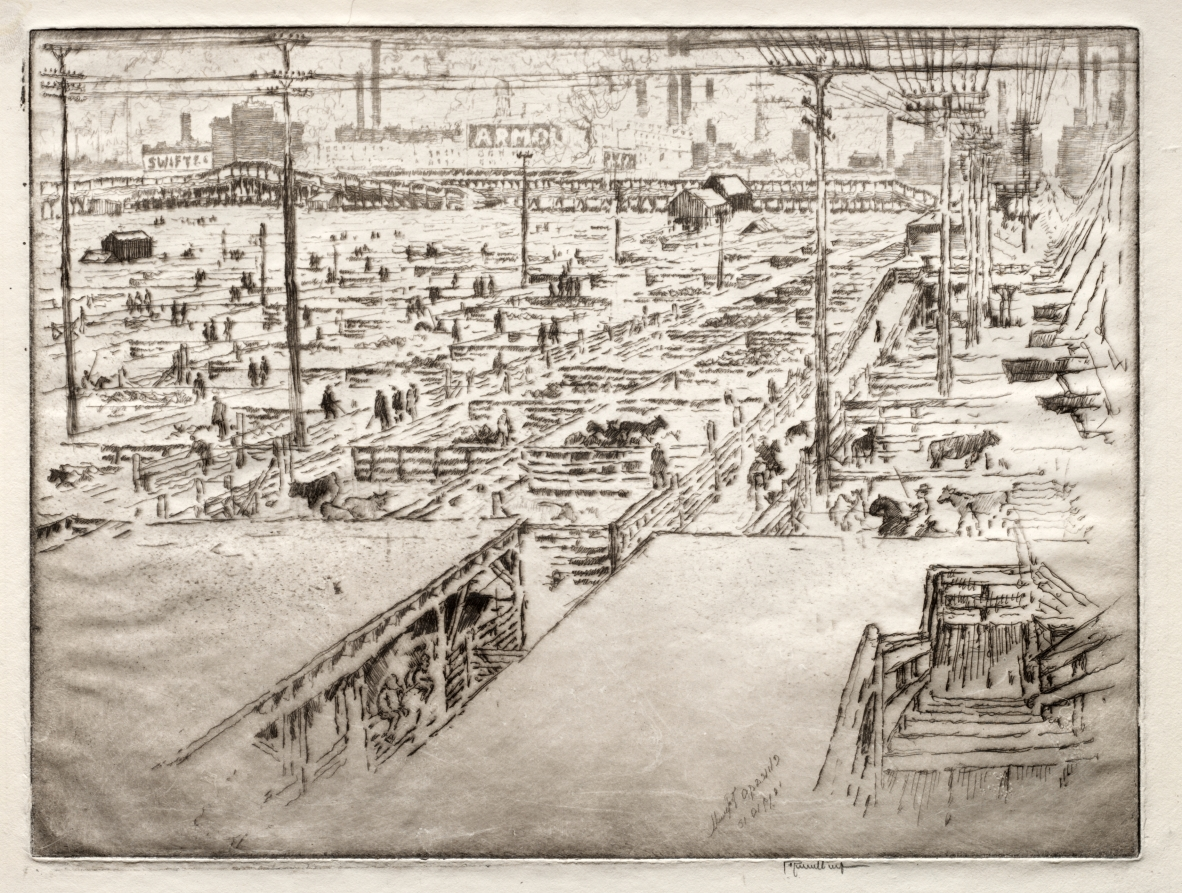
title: Stockyards, Chicago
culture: America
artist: Joseph Pennell (American, 1857–1926)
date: 1910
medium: etching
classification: Print